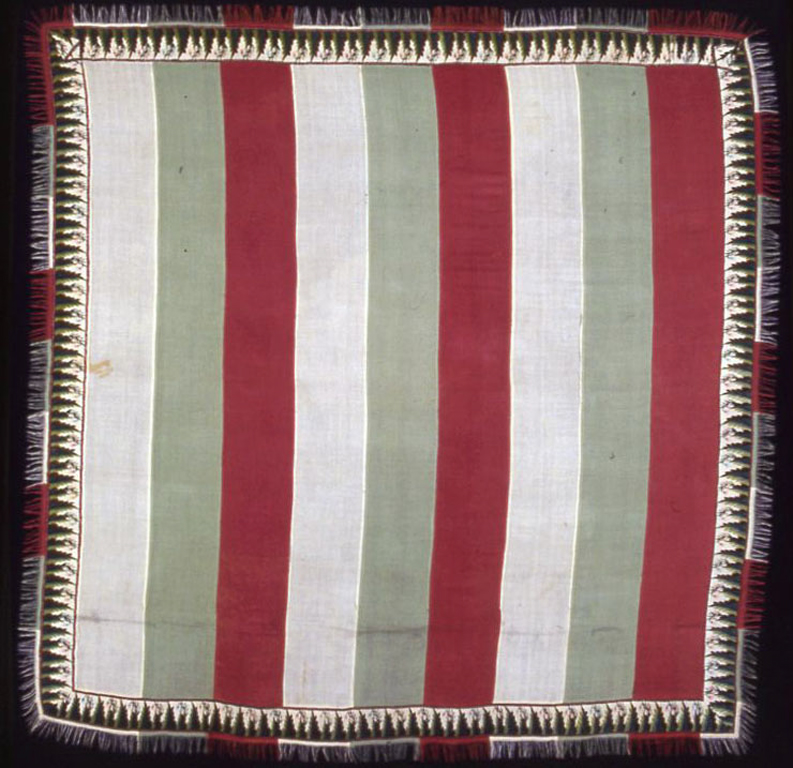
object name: Textile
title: Square Shawl (Turnover)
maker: Russia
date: c. 1830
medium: Wool, strips of 2:2 'S' twill weave; borders of dovetailed tapestry weave, reversible; attached "Harlequin" tabs of pieced 2:2 'S' twill weaves; warp fringe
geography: Russia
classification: textile; weaving